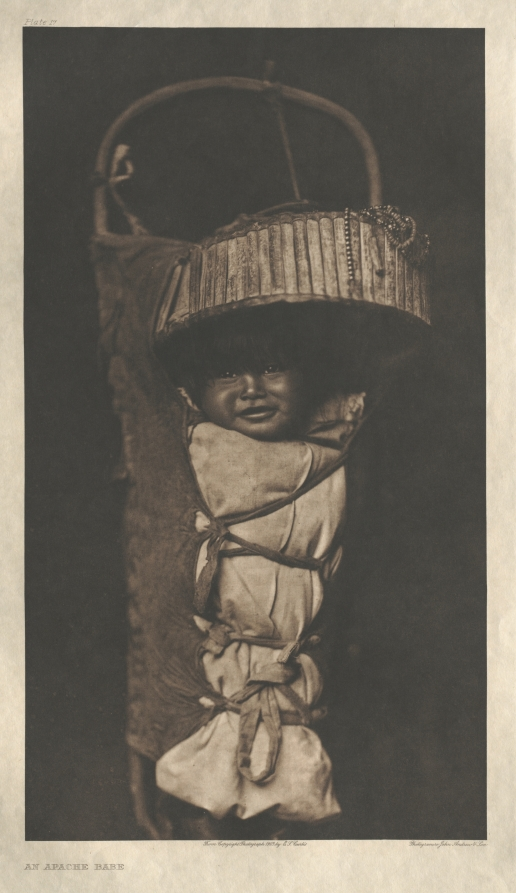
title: Portfolio I, Plate 17: An Apache Babe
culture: America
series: The North American Indian: being a series of Portfolios picturing and describing the Indians of the United States, the Dominion of Canada, and Alaska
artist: Edward S. Curtis (American, 1868–1952)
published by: The University Press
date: 1903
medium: photogravure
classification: Portfolio